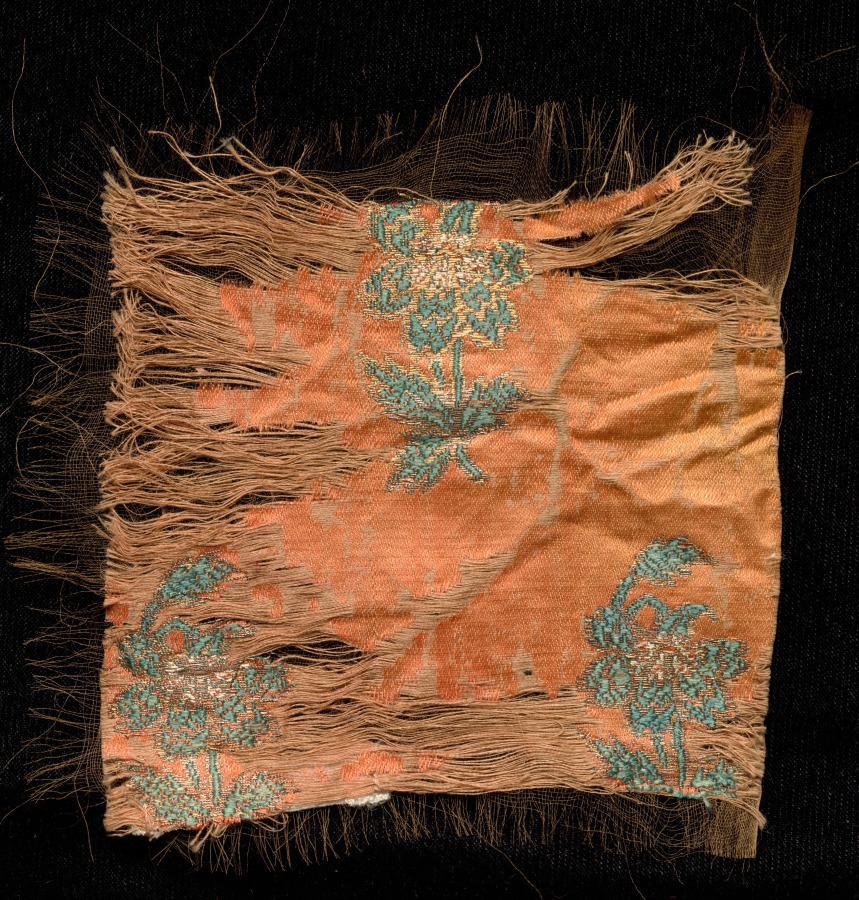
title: Fragment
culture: India, 19th century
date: 1800s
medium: brocade; silk and metal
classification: Textile